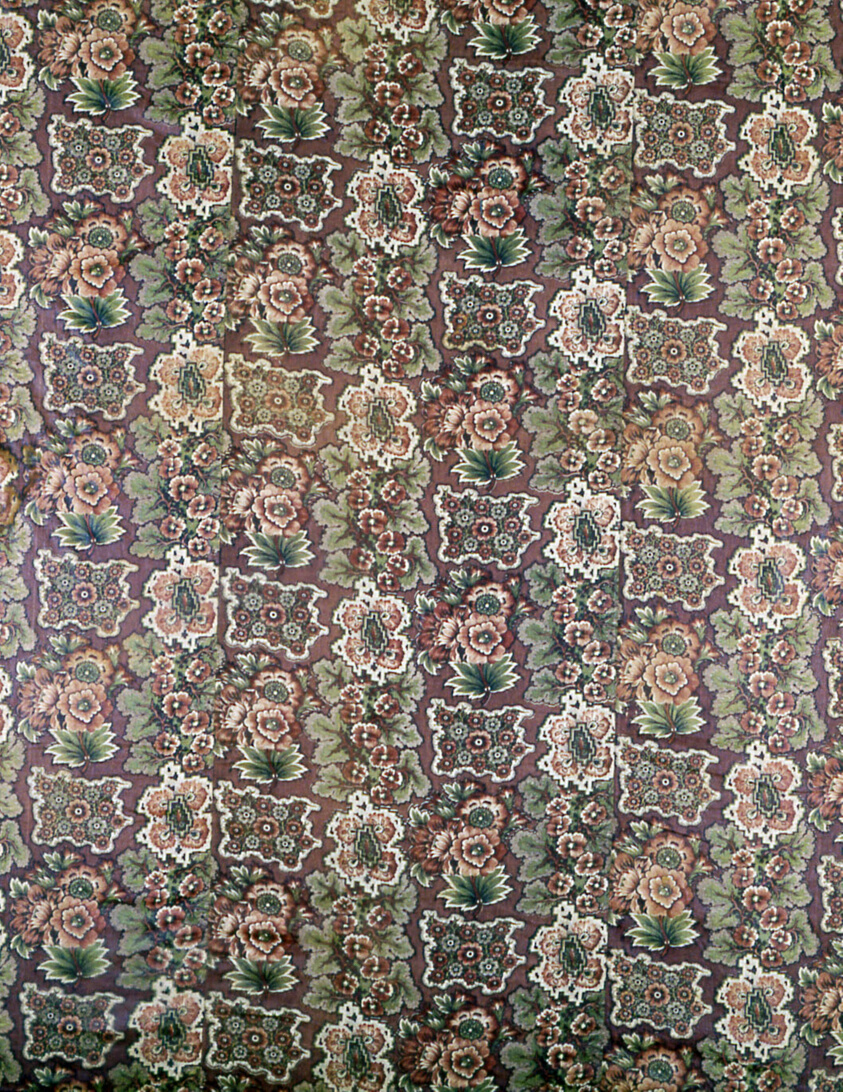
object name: Textile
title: Panel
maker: England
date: 19th century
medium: Cotton, plain weave; roller printed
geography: England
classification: textile; weaving - printed